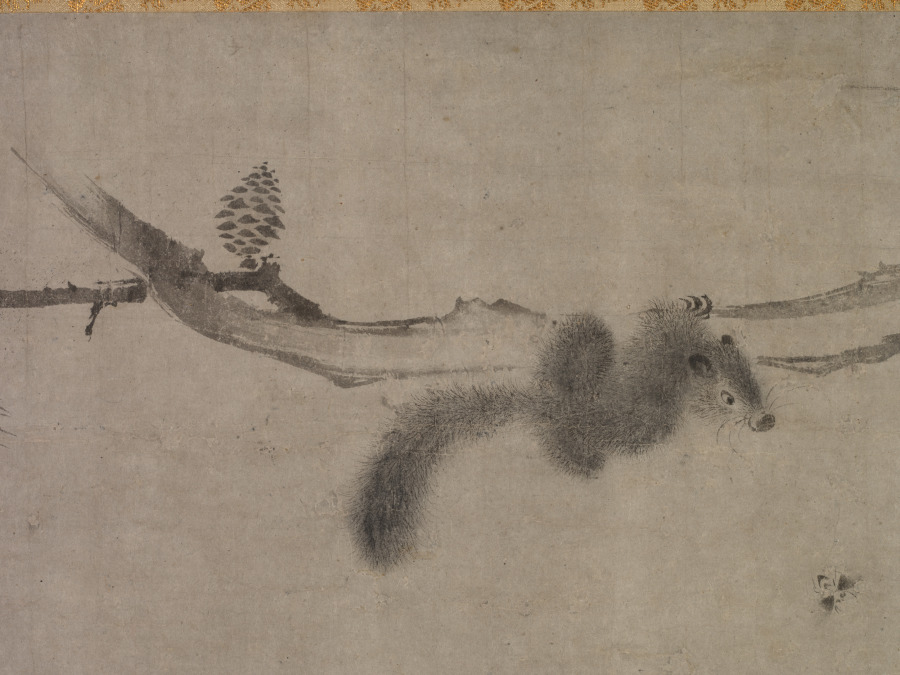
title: Squirrel on a Pine Branch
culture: China, Ming dynasty (1368–1644)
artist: Song Tian (Chinese, active 1300s)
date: 1500s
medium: hanging scroll, ink on paper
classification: Painting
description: This painting captures a squirrel in action, distracted and twisting its head while climbing and looking at a little bug to the right. The painter skillfully employs a combination of ink washes and fine brushstrokes to simulate the animal’s fur. Only three simple curved lines depict the squirrel’s claws. The subject of squirrels did not appear in Chinese painting before the late Southern Song (1127–1279) and Yuan periods (1279–1368). The painter Songtian was one of the few Yuan painters who specialized in this theme.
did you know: Although the evergreen pine does not indicate a time of year, the lively activity of the squirrel and the insect suggest a warm season.